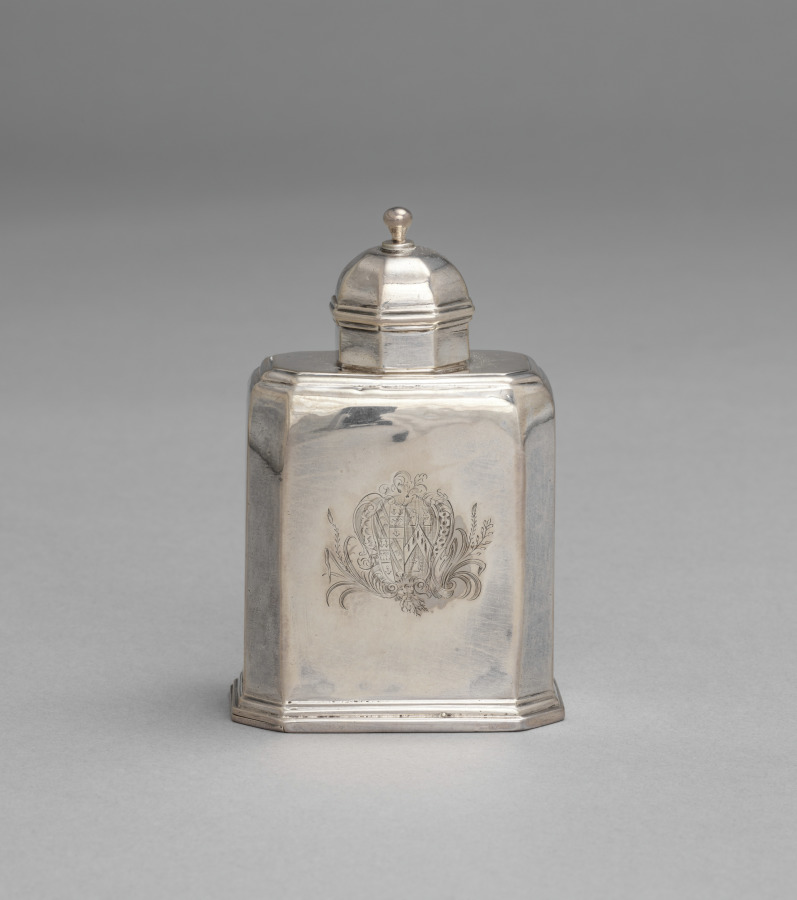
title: Tea Caddy and Cover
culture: England, London, 18th century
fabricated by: Thomas Ash (British)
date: 1713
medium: silver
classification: Silver